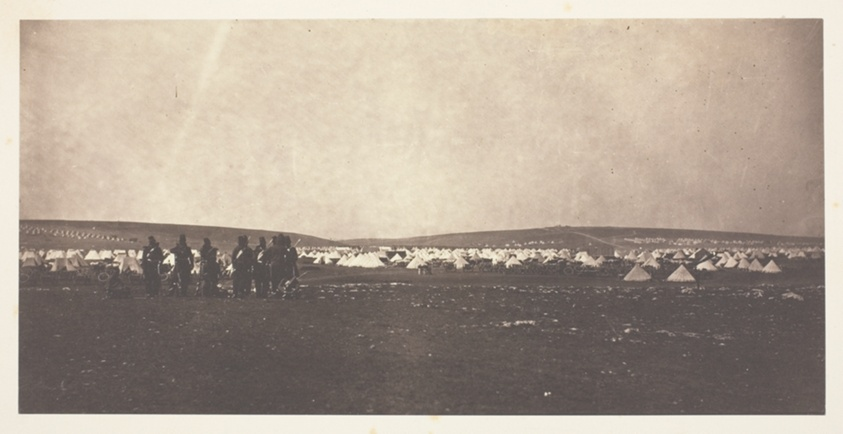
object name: Photograph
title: Picquet House, Cathcart's Hill, from General Bosquet's Quarters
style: 19th century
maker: Roger Fenton (English, 1819–1869)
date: 1855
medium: Salted paper print, from the album "Photographic Pictures of the Seat of War in the Crimea" (1856)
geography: England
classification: salted paper print; photographic process; photography; photograph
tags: Collected by Hugh Edwards